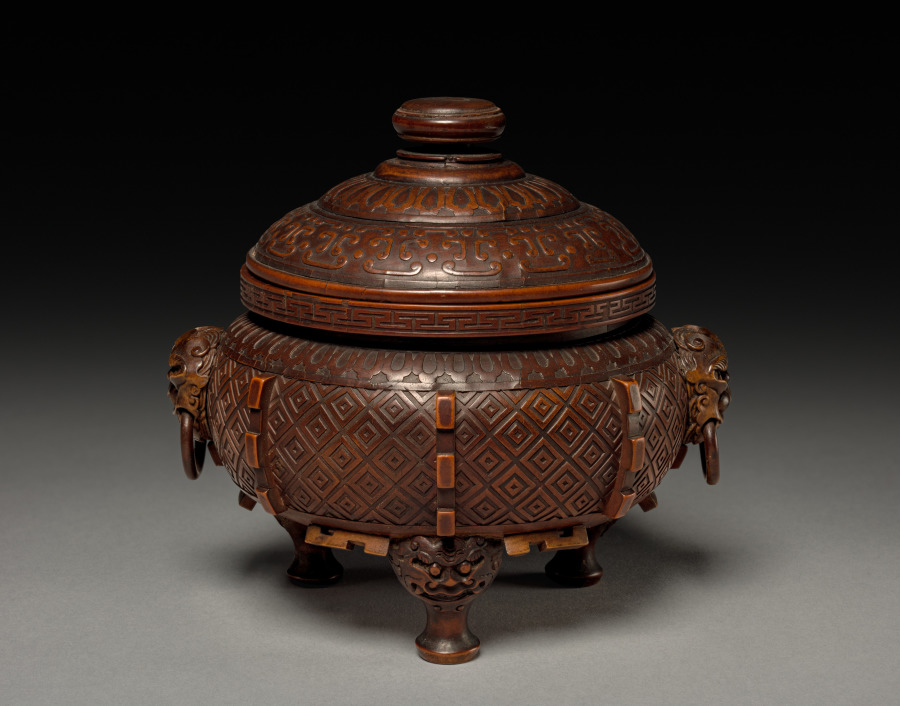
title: Tripod with Cover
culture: China, Qing dynasty (1644-1911)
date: late 1700s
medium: carved wood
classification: Wood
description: In the Qing (1644–1911) dynasty, luxury items became more affordable to larger parts of the society, including women, merchants, and literati in non-official positions. Imperial patronage and a growing urban population encouraged consumption of luxury goods and local craftmanship. This wooden tripod illustrates superb carving skills and the creative mind of the skilled artisan who sought clients on a competitive market.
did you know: Each leg of the tripod is decorated with a lion head.